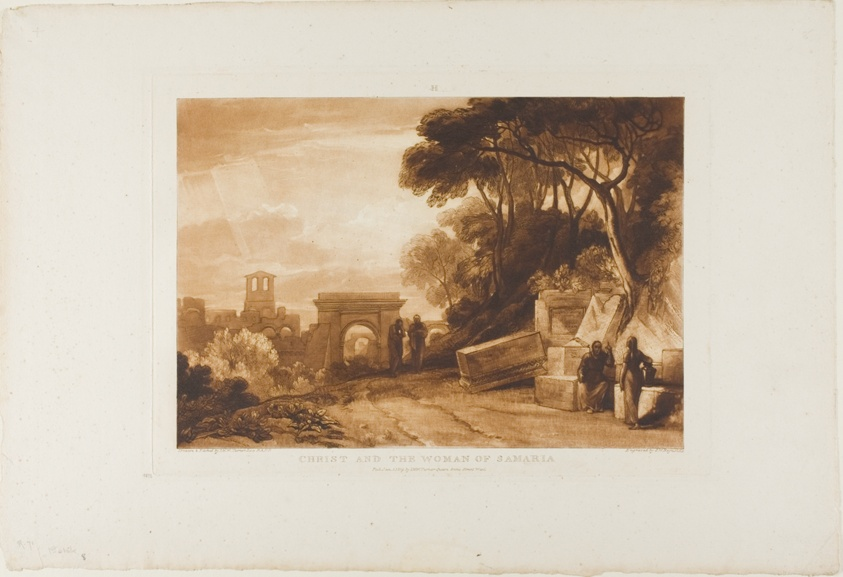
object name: Print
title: Christ and the Woman of Samaria, plate 71 from Liber Studiorum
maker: Joseph Mallord William Turner (English, 1775-1851); Samuel William Reynolds (English, 1773-1835)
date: published January 1, 1819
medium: Mixed intaglio in brown on cream wove paper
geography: England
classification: mezzotint; print; prints and drawing